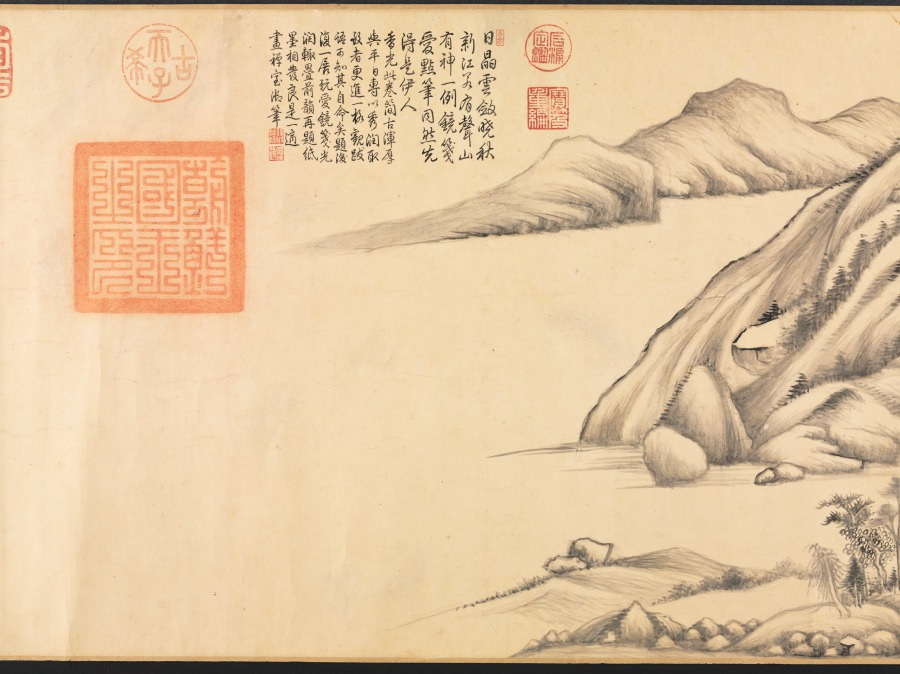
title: River and Mountains on a Clear Autumn Day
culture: China, Ming dynasty (1368–1644)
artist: Dong Qichang (Chinese, 1555–1636)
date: c. 1624–27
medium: Handscroll; ink on Korean paper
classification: Painting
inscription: 黃子久江山秋霽似此，當恨古人不見我也。思翁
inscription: 董文敏每遇高麗鏡面箋，書畫尤為入神。此卷改表紙用之，字跡隱然，兼有朝鮮之印。至於筆法圓秀，真接倪黃。豈文沈所可同日而語也。 康熙庚午中秋後一日，天氣澄爽，重裝初畢，跋於瓶廬。抱瓮翁高士奇。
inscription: Second inscription by Gao Shiqi 高士奇 (1645–1704): On the twenty-third day of the ninth month, the jiaxu year of the Kangxi era [1694], I packed my bags to head north. When my boat passed Wuchang [Suzhou], Mr. Mantang [Song Luo] brought wine to bid me farewell so that we could share our thoughts on our separation in the last few years. I showed him the paintings and calligraphy which I collected and asked his opinions. Since Mr. Mantang does not own any handscrolls by Wenmin [Dong Qichang], I leave this one for him in commemoration of our parting; thus the painting will have a worthy owner and our meeting will become a beautiful story in the future. It is the fourth day after the beginning of winter, with the sky clear and sober. Trees under frost have turned red and yellow, seemingly echoing the brush and ink in the painting. I also ask Mr. Mantang to inscribe a poem to commemorate our meeting so that it will survive forever.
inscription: 1 colophon and 4 seals of Song Luo 宋犖 (1634–1713): Who is the foremost art connoisseur of our dynasty?/ Tangcun [Liang Qingbiao, 1620–1691] is dead, so the title passes to Jiangcun [Gao Shiqi]./ Leaving office, you retired for five years in the Lake region./ Fondling handscrolls and hanging scrolls from morning to evening./ You sent me your collection catalogue Xiao Xia Lu last year;/ It is indeed the true equal of [Zhou Mi's] Yun Yan Guo Yan./ This year you returned to the capital by imperial order;/ Your boat with calligraphy and paintings anchored at the river bank in Suzhou./ When we met each other you did not waste any time for conversation by poured out immediately/ From your "coral net" extraordinary treasures./ You produced incomparable scrolls, with gold-inscribed labels and jade rollers,/ Pouring out from bags and trunks, they were spread in disarray./ Without a word, I rolled and unrolled until my fingers were numbed,/ We sat straight, facing each other quietly, and never felt tired./ For three days we forgot about sleeping and food./ And at times we shouted our joy out loud, forgetting who is host or guest./ Your Dwelling in the Fuchun Mountains and the Yuansheng manuscript/ These peerless works I myself examined with delight./ As an added pleasure to the farewell dinner under the Maple Bridge,/ You allowed me to hold again this handscroll by Dong Qichang--/ The Misty River and Piled Peaks [by Zhao Mengfu] and this Clear Autumn Day are two extraordinary masterpieces./ In showing such life and spirit with "qi yun." the artists were truly "men of heaven."/ The Clear Autumn Day is not even three feet long,/ Painted on tributary Korean paper, it shines like silver./ Every building up and every turn of the mountains imitates nature,/ Every tree and every rock is removed from the commonplace./ From the beginning, the theory of poetry is the theory of painting,/ Like the lotus and the morning sunshine, they complement and refresh each other./ The artist's inscription regrets that "the Old Masters cannot see my scroll."/ Huang Gongwang would have agreed in his grave./ The vermilion of the seals glitter and dazzles the eyes,/ These added accessories are as valuable as jade./ You are very kind to give it to me,/ The feelings expressed in your inscription are so sincere./ Wanting to refuse, but unable, I accept it to respect your wish,/ And taking off my gown and cap I wrapped it with care./ You asked me to write a long poem in commemoration of this beautiful occasion,/ I am too ashamed that my effort in response is so poor and inadequate./ Returning home, I unrolled it under candlelight, trying to write the colophon,/ The light of the waning moon shines at the foot of the mossy wall./ Earnestly humming and brows knit in deep thought, I try to compose;/ The verses are not outstanding, but the facts are real./ With this poem recorded at the end of the scroll, I mail it to you for approval,/ This poem and this painting shall outlast a thousand springs. (Translation by LYSL/HK/WKH)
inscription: 1 colophon and 2 seals of Shao Changheng 邵長蘅 (1637–1704); 2 inscriptions and 14 seals of the Qianlong 乾隆 emperor (r. 1736–95); 1 seal of the Jiaqing 嘉慶 emperor (r. 1796–1820); 3 seals of the Xuantong 宣統 emperor (r. 1908–11); 1 seal unidentified.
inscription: [印] 朝鮮國王之印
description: Dong Qichang had a tremendous impact on the artistic practices and historiography of later generations; his works and writings shaped literati aesthetics. Here, Dong places an abstract landscape composition diagonally across the picture plane, configured to recall earlier masters and simultaneously express his own personal style. Dong’s inscription claims, Huang Gongwang’s Autumn Day, looks like this. I truly regret the master has not seen my work. In fact, Dong Qichang may have had Dong Yuan’s Xiao and Xiang Rivers in mind, a work he owned and considered a key work in Chinese art history.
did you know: The painting has an imprint of a Korean seal that reads "Seal of the king of Joseon."